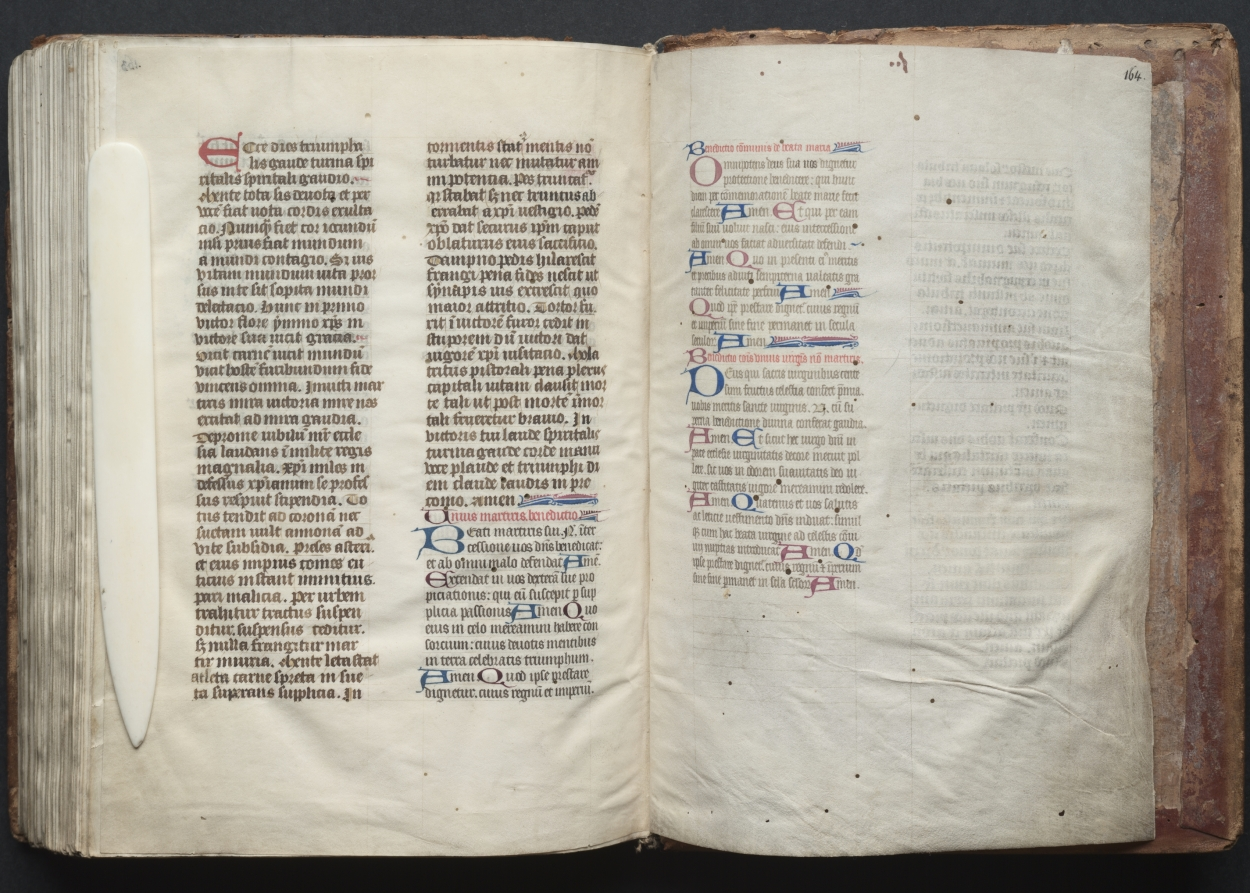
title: The Gotha Missal: Fol. 163v, Text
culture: France, Paris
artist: Master of the Boqueteaux (French)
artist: and Workshop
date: c. 1375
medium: ink, tempera, and gold on vellum; blind-tooled leather binding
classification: Bound Volume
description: The style and quality of this manuscript's decoration is typical of deluxe Parisian books made for aristocratic or royal patrons. Most of the book's decoration appears to be the work of the Master of the Boqueteaux, an artist active at the court of King Charles V (died 1380). His style was apparently shared by a number of book illuminators working in and around Paris. It is very possible that the Gotha Missal belonged to Charles V, but is not provable because the manuscript has no royal portraits and lacks a colophon. Given the book's magnificent decoration, however, it would seem that it was produced for a Valois prince, if not for the king himself. The manuscript receives its name from the German dukes of Gotha, its later owners.